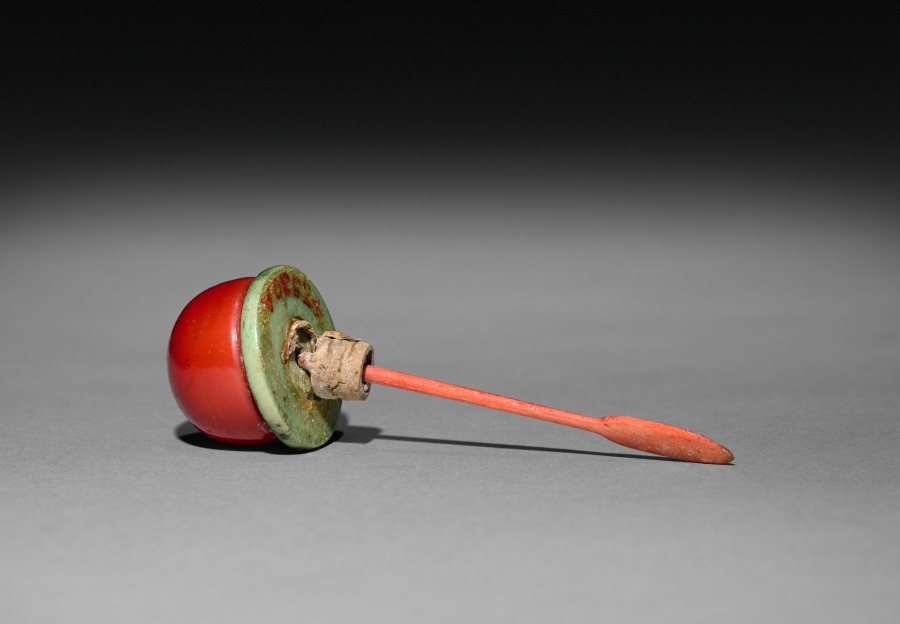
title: Snuff Bottle with Stopper (stopper)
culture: China, Qing dynasty (1644-1911)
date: 1800s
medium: glass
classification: Glass